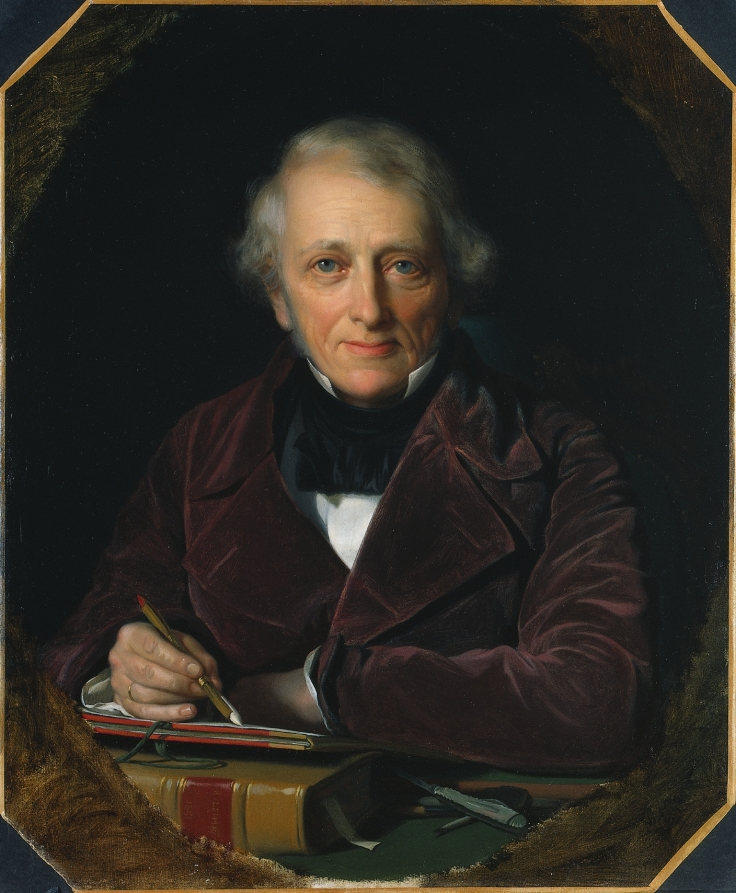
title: Leo Lehmann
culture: Germany, 19th century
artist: Rudolf Lehmann (German, 1819–1905)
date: 1851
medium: oil on fabric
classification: Painting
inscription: Signed lower center on spine of book in light-brown paint: r. lehman- [h and m attached] / 1851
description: This portrait portrays the artist's father, himself a painter and printmaker who gave his son his earliest artistic training. Fittingly, Lehmann depicted his father at work, surrounded by the tools of his trade. Resting his arms upon a sheet of paper supported by a book and a portfolio, Leo Lehmann holds a portecrayon, a penlike holder for the 19th-century equivalent of modern wax crayons. His intense gaze and his poised drawing implement suggest that he may be recording the likeness of his son, who at the same time paints his father's portrait. Lehmann was a successful portrait painter, especially among the English aristocracy, during the latter half of the 19th century. His popularity resulted not only from his remarkable ability to reproduce the appearance of surfaces—like his father's velvet coat—but also his capacity to capture the psychological presence of his sitters.